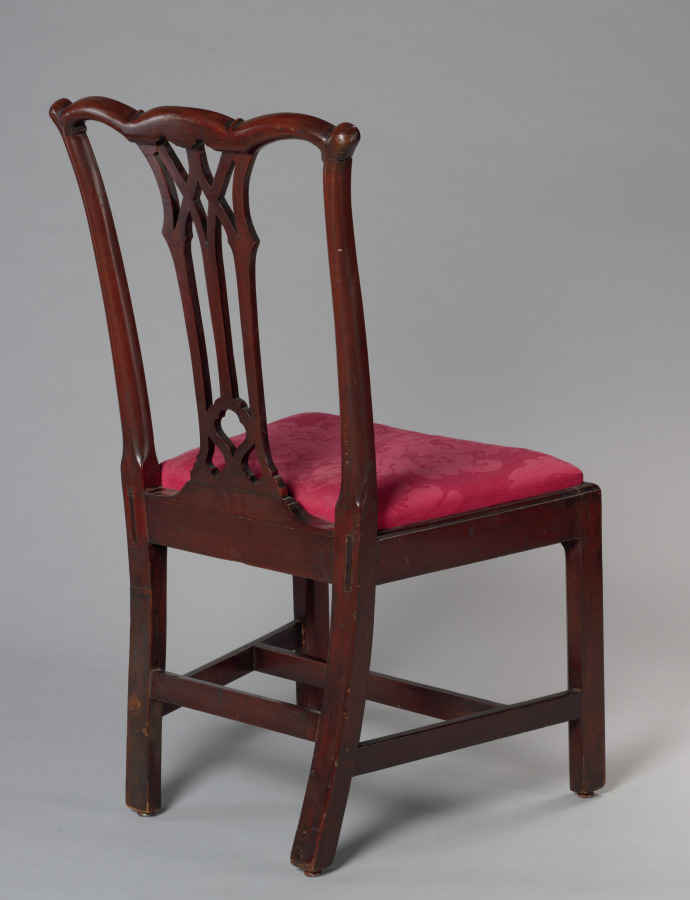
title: Side Chair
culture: America, Pennsylvania, Philadelphia, Chippendale style, 18th century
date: c. 1780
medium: wood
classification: Furniture and woodwork